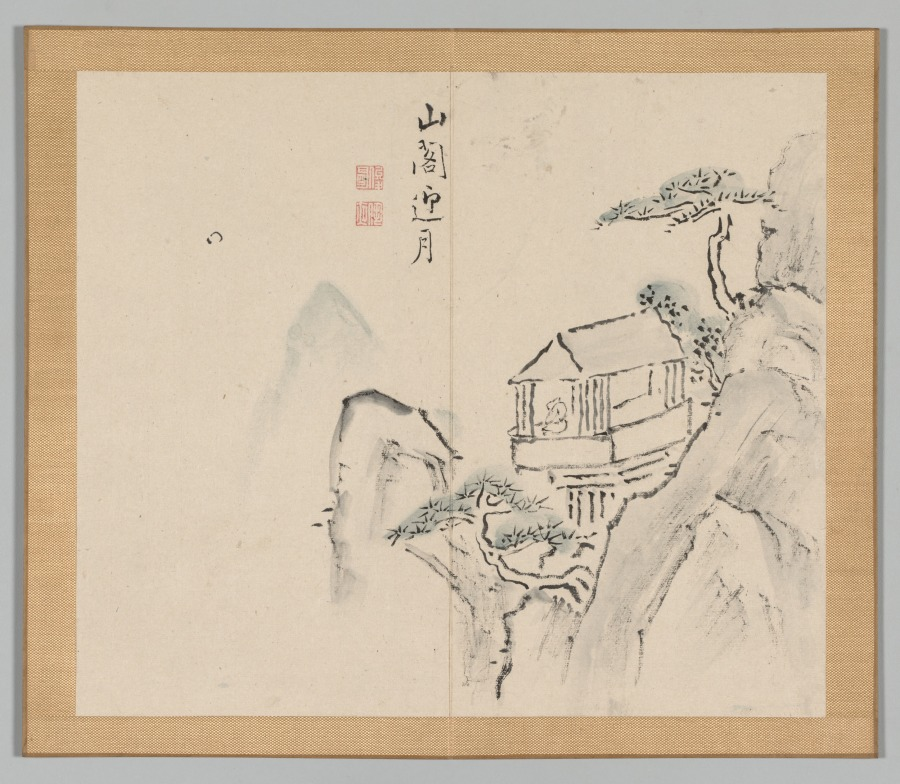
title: Reverberations of Taiga, Volume 2 (leaf 31)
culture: Japan, Edo period (1615–1868)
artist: Aoki Shukuya (Japanese, d. 1802)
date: mid- to late 1700s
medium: double-leaf from a pair of albums; ink and light color on paper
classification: Portfolio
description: Traditionally, young painters in Japan began their studies with an established master-painter. The master's compositions invariably became models that the apprentice copied to learn various ink and brush techniques. Shukuya was a pupil of the famous Kyoto artist Ikeno Taiga, whose style is reflected in these sketches of rocks, trees, and mountains.